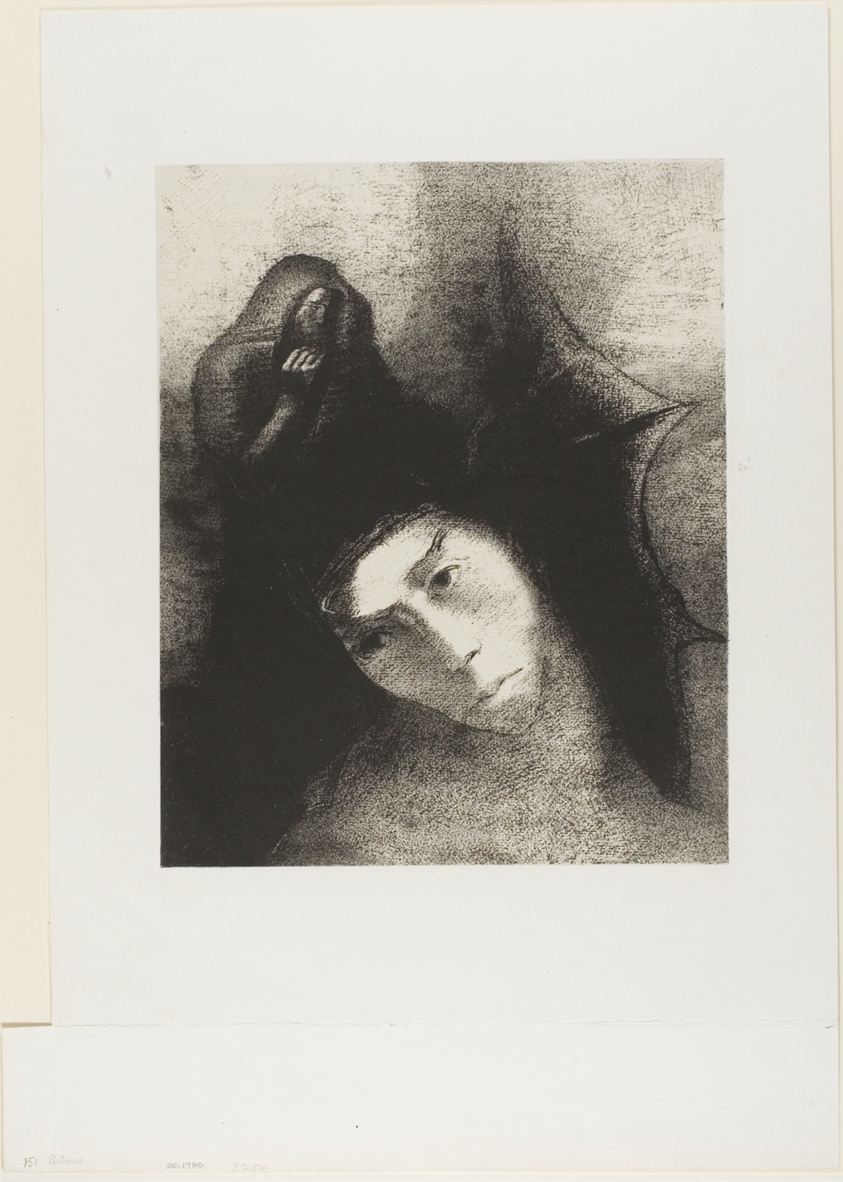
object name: Print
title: Anthony: "What is the object of all this?" The Devil: "There is no object!", plate 18 of 24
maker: Odilon Redon (French, 1840-1916)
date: 1896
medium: Lithograph in black on light gray China paper laid down on ivory wove paper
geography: France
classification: lithograph; print; prints and drawing; paper